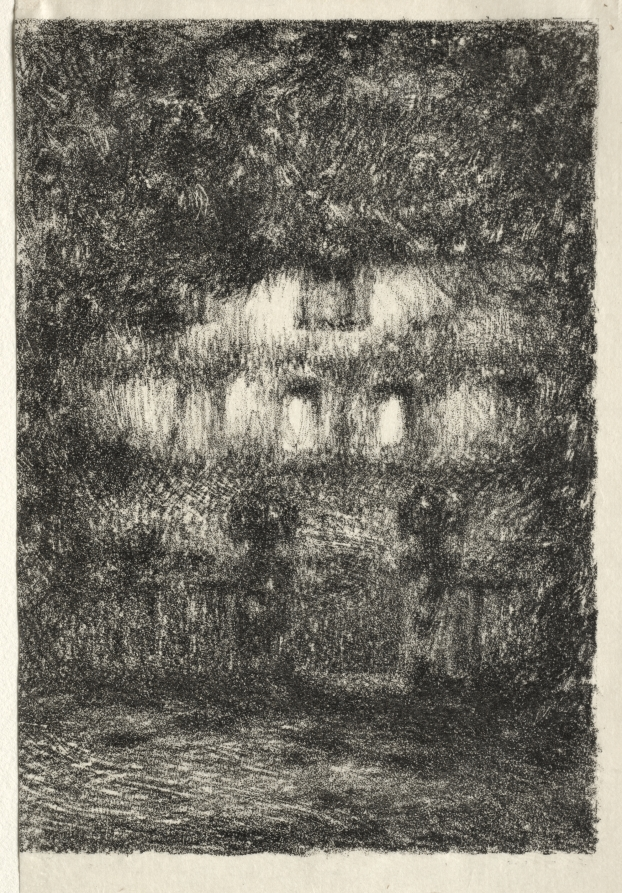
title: The House in Moonlight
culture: France, 20th century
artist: Henri Le Sidaner (French, 1862–1939)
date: 1909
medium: lithograph printed in black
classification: Print